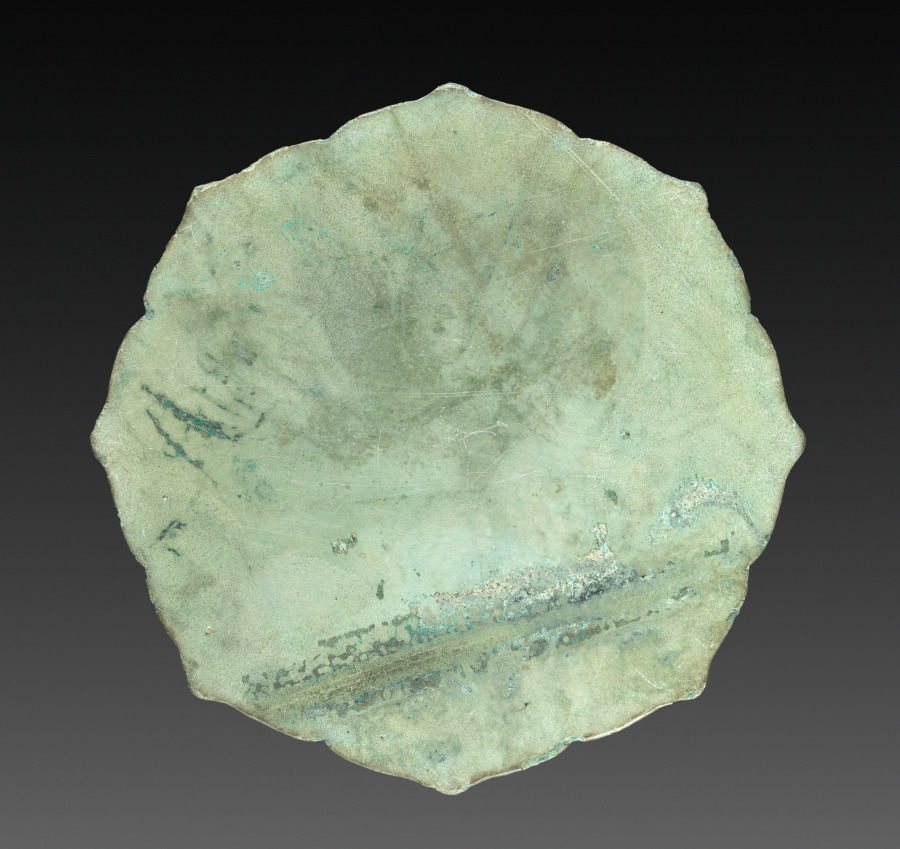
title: Mirror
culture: Japan, Heian period (794–1185)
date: 794–1185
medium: bronze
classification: Metalwork